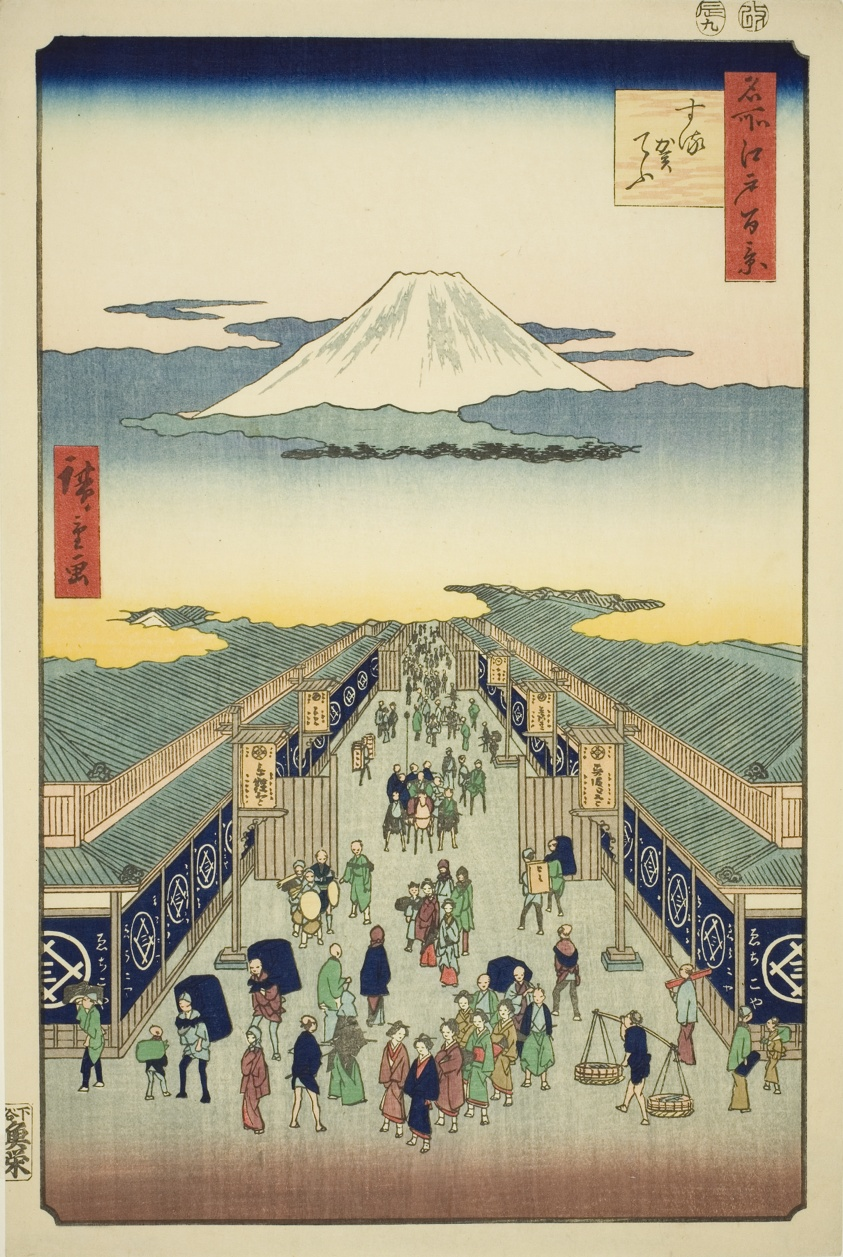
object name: Print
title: Surugacho, from the series "One Hundred Famous Views of Edo (Meisho Edo hyakkei)"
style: Japanese (culture or style)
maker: Utagawa Hiroshige 歌川 広重; Japanese, 1797-1858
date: 1856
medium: Color woodblock print; oban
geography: Japan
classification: woodblock print; print; asian art